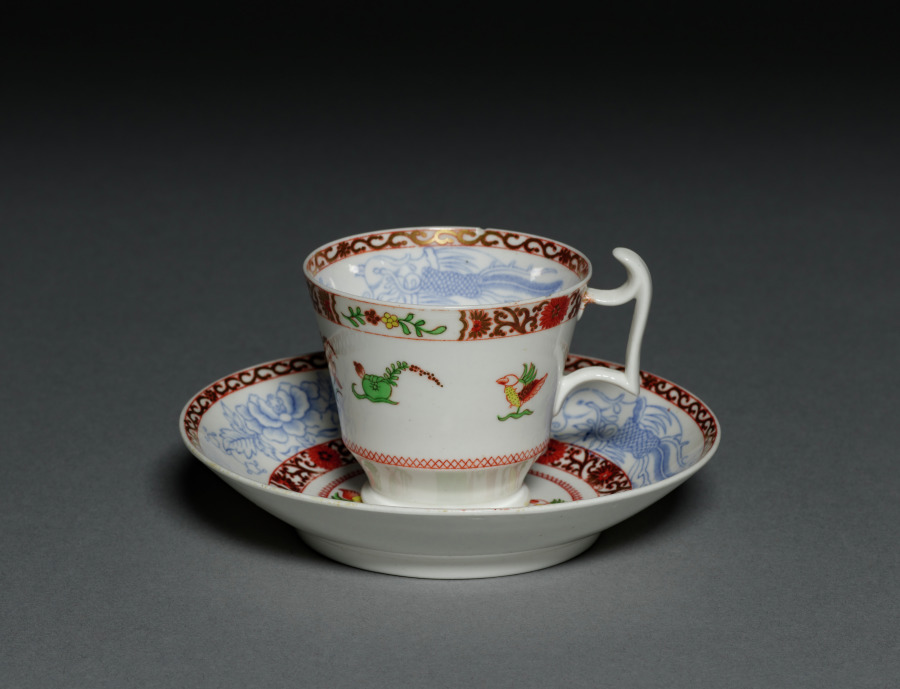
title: Cup and Saucer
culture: England, Staffordshire, 18th-19th century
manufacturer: Spode Factory (British)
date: 1700s-1800s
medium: porcelain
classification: Ceramic